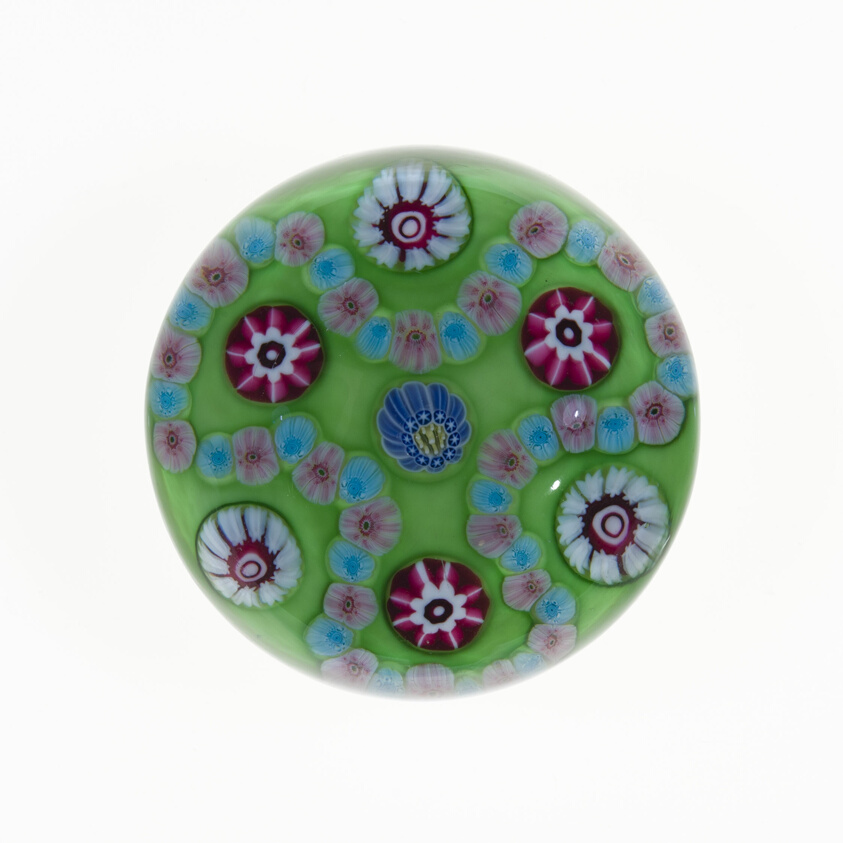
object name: Glass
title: Paperweight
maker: Clichy Glassworks (Cristalleries de Clichy); Clichy, France, 1837-1885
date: 19th century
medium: Glass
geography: Clichy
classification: paperweight; millefiori; european decorative arts; glass